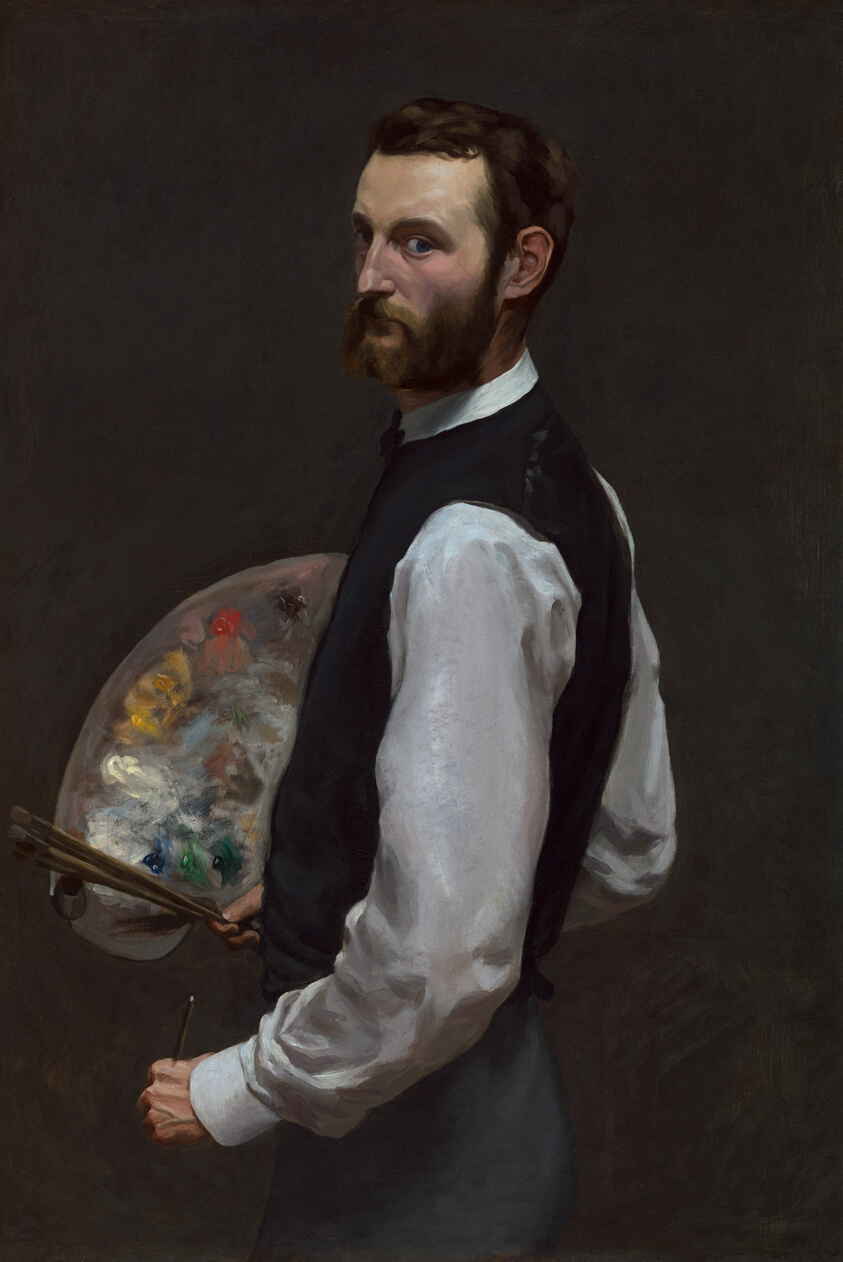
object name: Painting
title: Self-Portrait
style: Impressionism, 19th century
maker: Frédéric Bazille (French, 1841-1870)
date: 1865–66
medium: Oil on canvas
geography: France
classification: oil on canvas; paint; painting; european painting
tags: portraits, paintbrushes, painters, artist, self-portraits, work, men